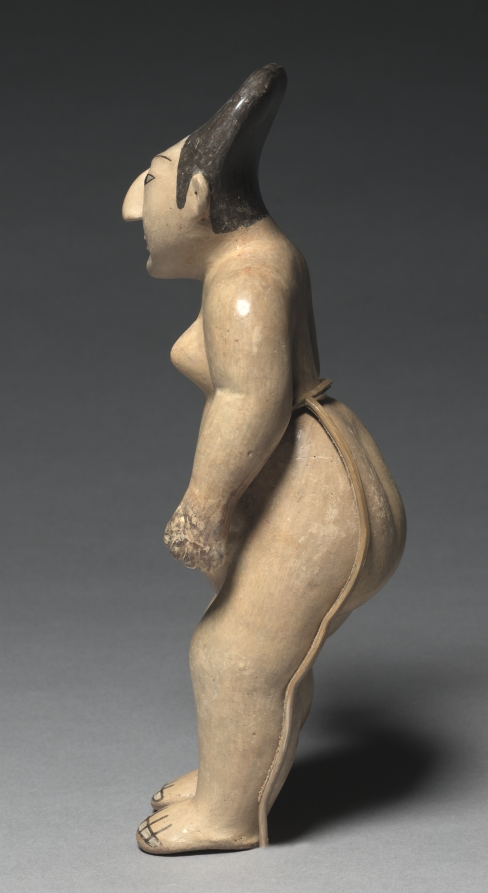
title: Female Figure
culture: Peru, South Coast, Nasca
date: 100 BCE–700 CE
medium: earthenware with colored slips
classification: Sculpture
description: This figure, which may once have worn small garments, might be a tomb offering. Her tapered head reflects the practice of cranial shaping, which may identify her social group and serve as a mark of beauty. Her fleshy hips likely refer to human and plant fertility, since food is the source of such bodily wealth. Her identity is unknown.